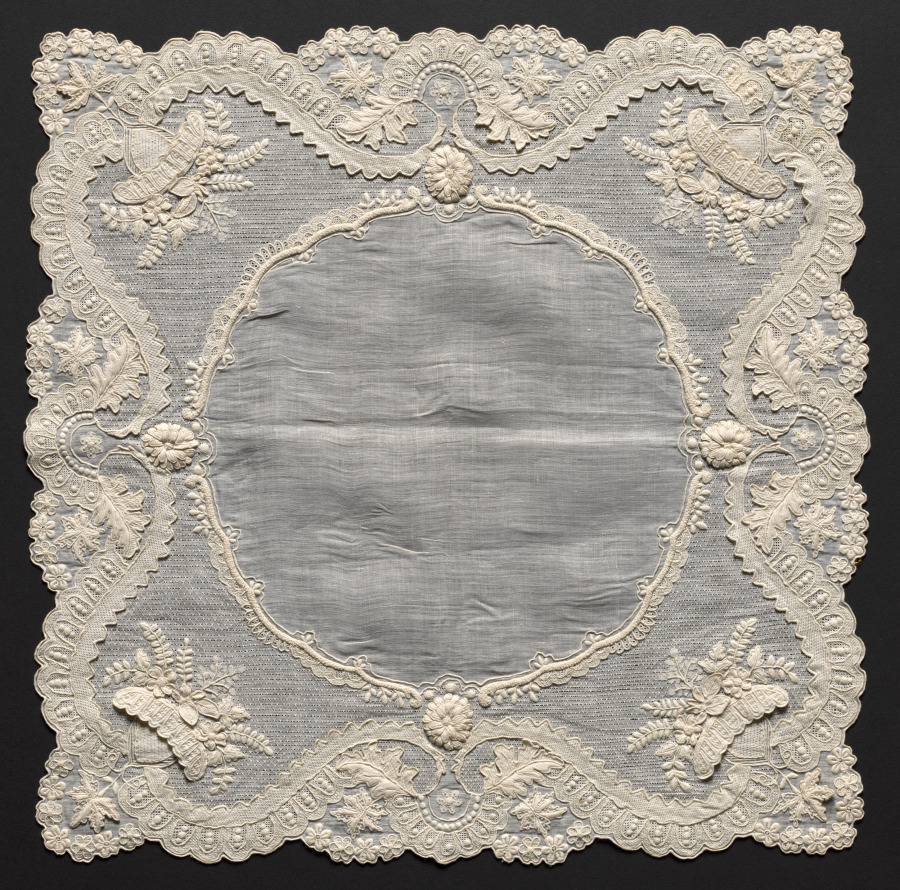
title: Embroidered Handkerchief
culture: Italy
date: 1800s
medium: Plain weave linen: needle lace (drawnwork) border and raised work embroidery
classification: Embroidery